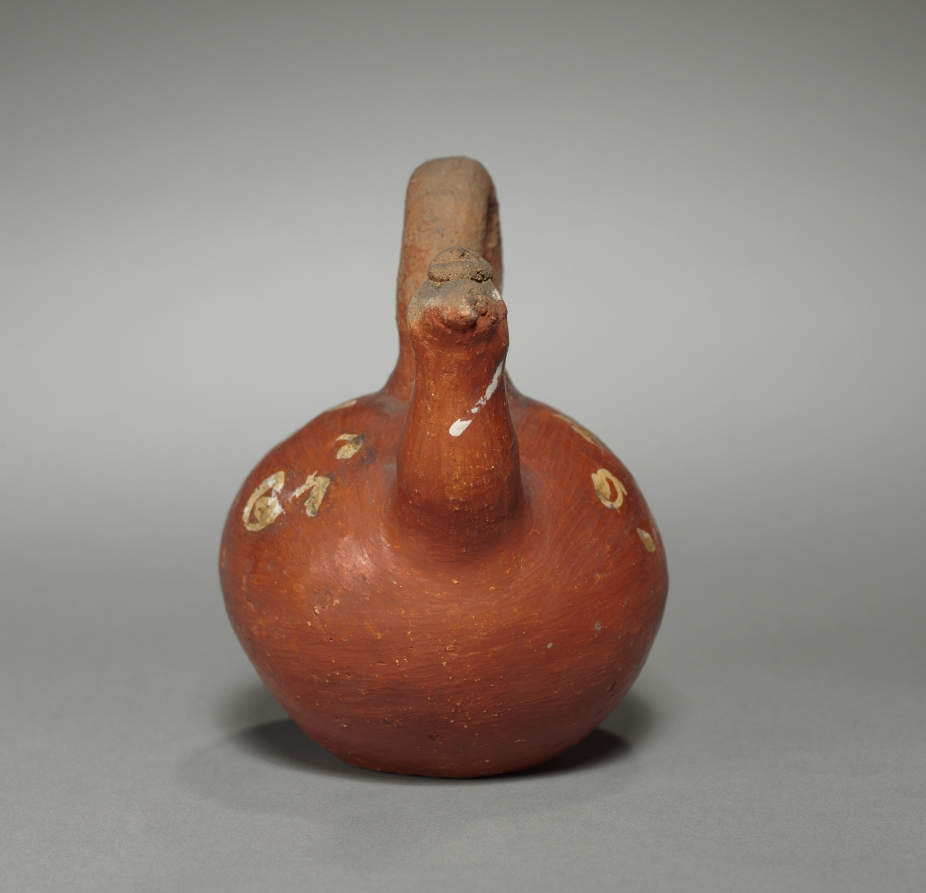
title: Bottle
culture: Peru, 20th century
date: 1900–1920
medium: pottery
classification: Ceramic